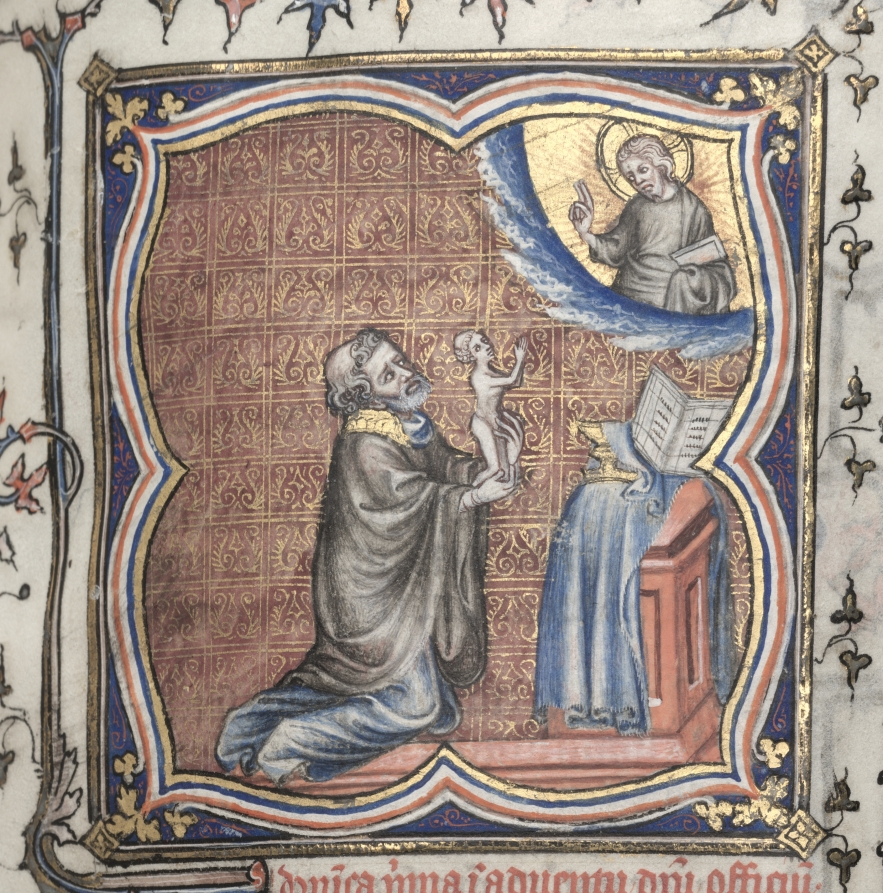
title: The Gotha Missal: Fol. 11r, Offering of the Souls; Bas-de-Page, Lions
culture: France, Paris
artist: Master of the Boqueteaux (French)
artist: and Workshop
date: c. 1375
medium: ink, tempera, and gold on vellum; blind-tooled leather binding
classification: Bound Volume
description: The style and quality of this manuscript's decoration is typical of deluxe Parisian books made for aristocratic or royal patrons. Most of the book's decoration appears to be the work of the Master of the Boqueteaux, an artist active at the court of King Charles V (died 1380). His style was apparently shared by a number of book illuminators working in and around Paris. It is very possible that the Gotha Missal belonged to Charles V, but is not provable because the manuscript has no royal portraits and lacks a colophon. Given the book's magnificent decoration, however, it would seem that it was produced for a Valois prince, if not for the king himself. The manuscript receives its name from the German dukes of Gotha, its later owners.